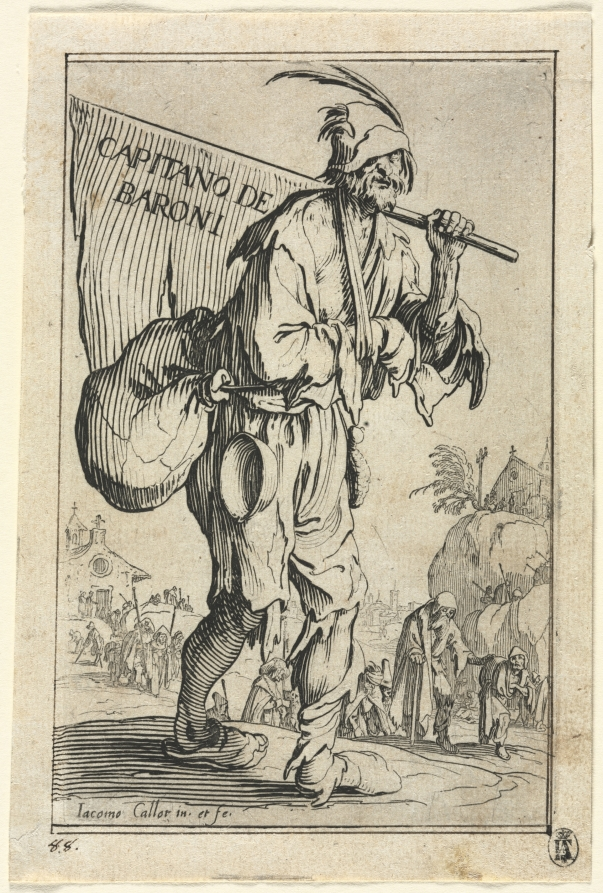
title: The Beggars: Frontispiece: Captain of the Barons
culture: France, 17th century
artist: Jacques Callot (French, 1592–1635)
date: c. 1623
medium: etching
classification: Print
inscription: Inscribed lower left in pen and brown ink: "88."